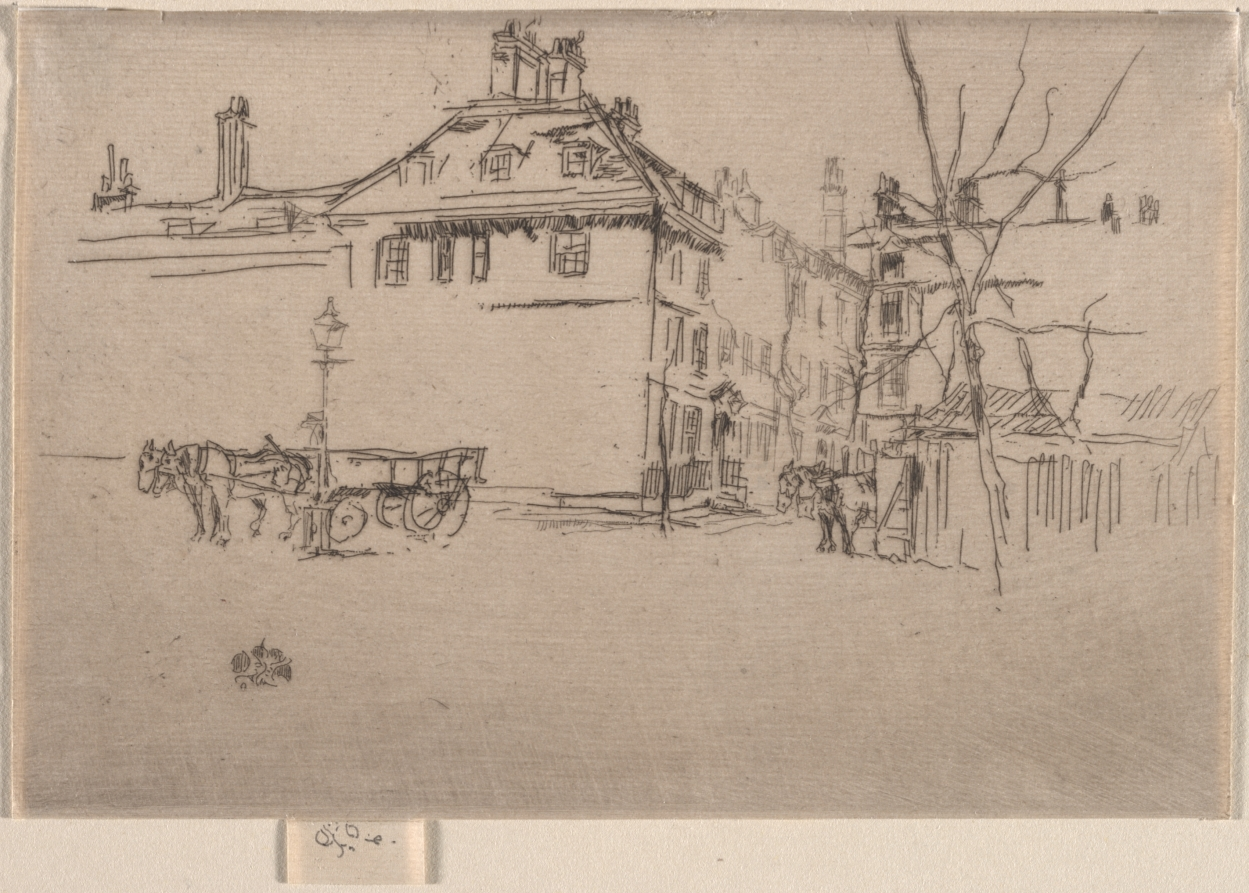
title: Temple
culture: America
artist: James McNeill Whistler (American, 1834–1903)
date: 1886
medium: etching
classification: Print